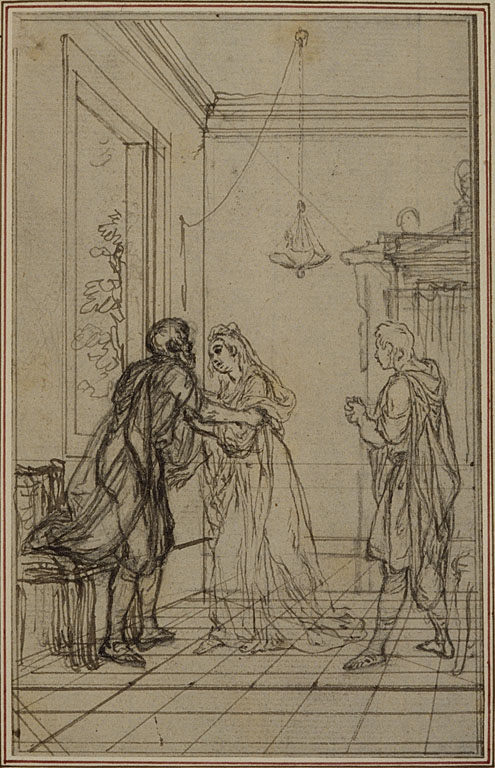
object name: Drawing and Watercolor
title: Study for Lucain's "La Pharsale", Canto II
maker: Hubert François Gravelot (French, 1699-1773)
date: c. 1766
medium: Pen and black ink, with graphite, on pale gray laid paper, incised for transfer and perimeter mounted on ivory laid paper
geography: France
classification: pen and ink drawings; drawings (visual works); prints and drawing